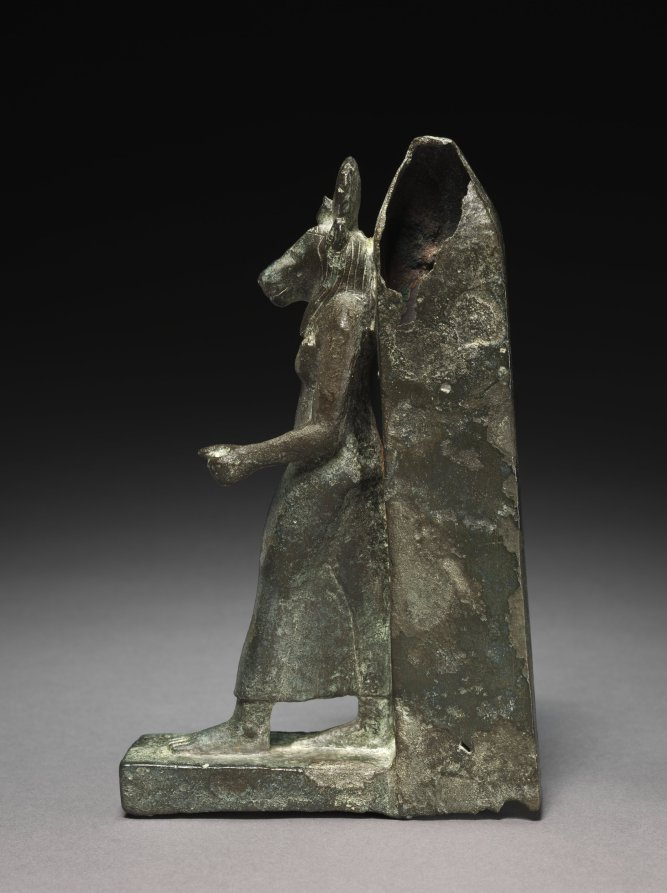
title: Statuette of Sekhmet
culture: Egypt, Late period (715–332 BCE), Dynasty 26 or later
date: 664–525 BCE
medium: bronze, figure solid cast, obelisk hollow cast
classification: Sculpture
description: The lion-headed goddess Sekhmet strides forward wearing a long, tight-fitting dress and striated wig indicating her divine nature. Behind her is an obelisk that is hollow and originally open at the bottom. Her left hand would have held an attribute such as a staff, which is now lost.